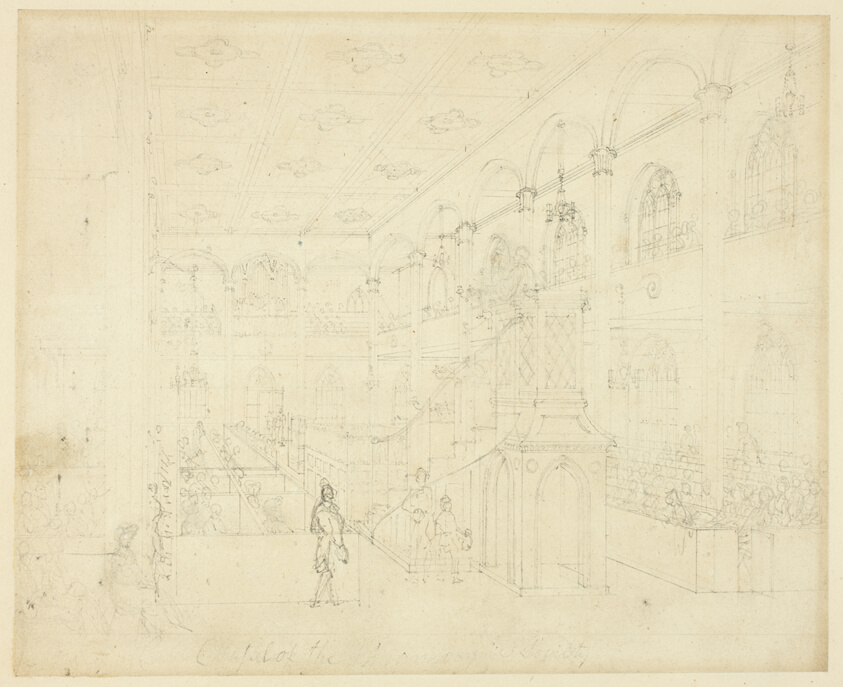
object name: Drawing and Watercolor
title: Study for Chapel of the Philanthropic Society, from Microcosm of London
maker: Augustus Charles Pugin (English, born France, 1762-1832); Thomas Rowlandson (English, 1756-1827)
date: c. 1809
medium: Graphite on cream wove paper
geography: England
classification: graphite; drawings (visual works); prints and drawing